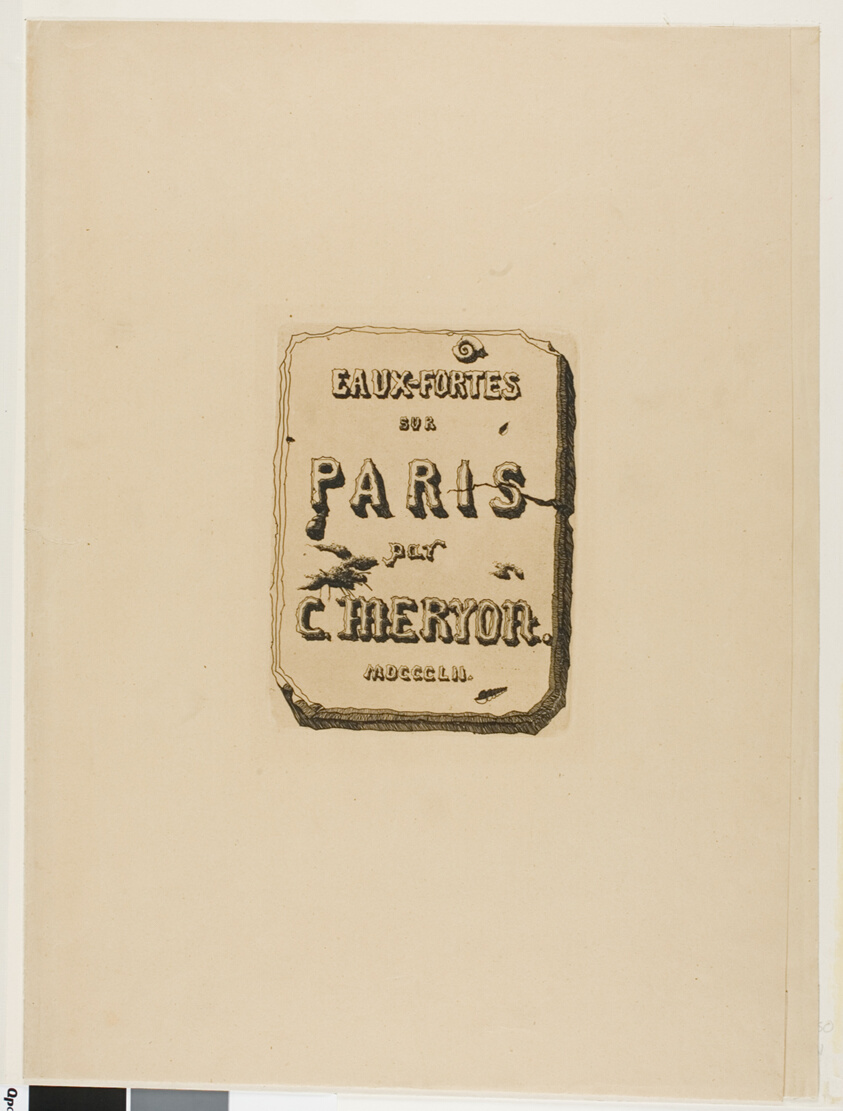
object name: Print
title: Title Page to Eaux-Fortes sur Paris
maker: Charles Meryon (French, 1821-1868)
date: 1852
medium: Etching in warm black on tan wove paper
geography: France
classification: etching; print; prints and drawing